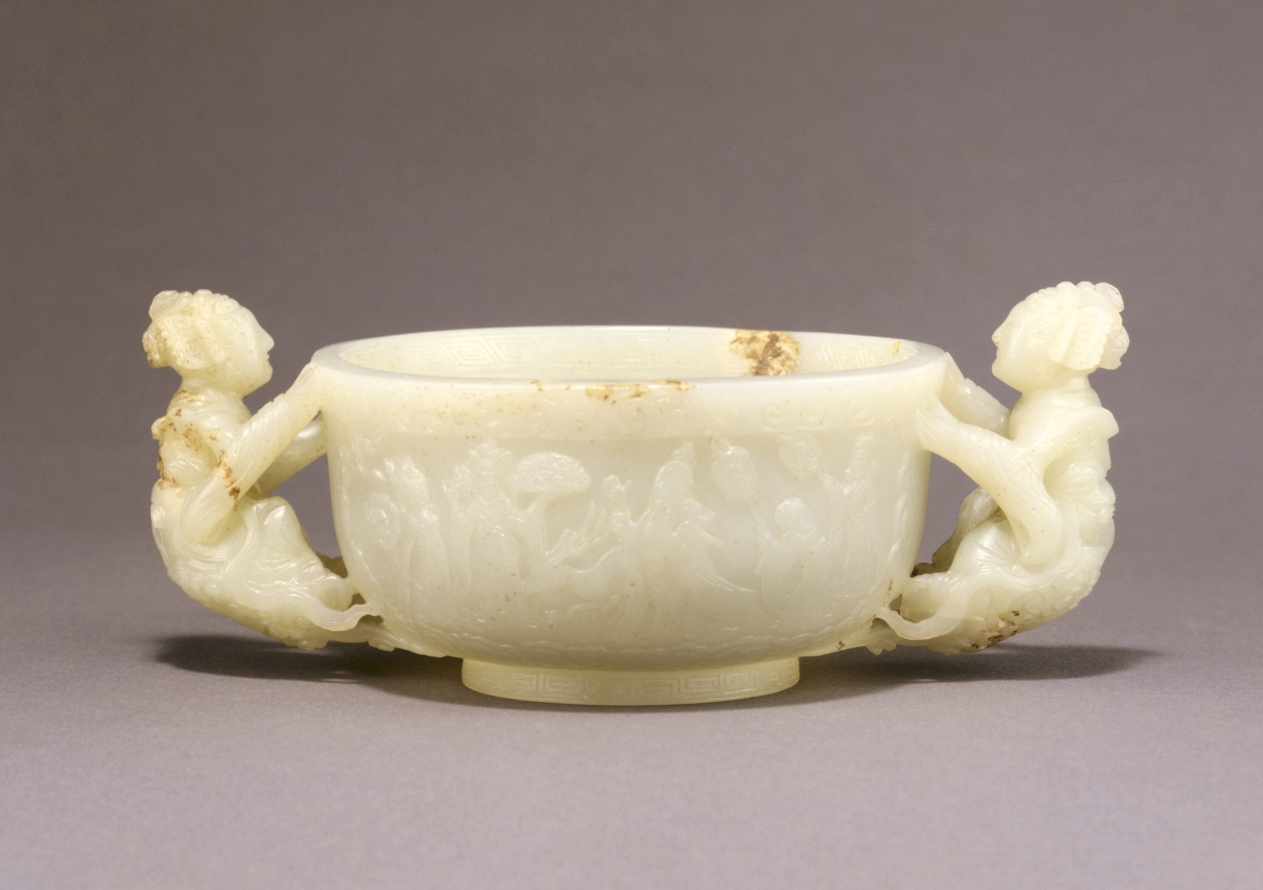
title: Cup with Daoist Figures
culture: China, Qing dynasty (1644–1911), Qianlong period (1736–95)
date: 1736–95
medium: Pale greenish-white jade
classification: Jade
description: During the Qing dynasty, Suzhou’s best products were sent north to the capital. Those that met imperial approval were sometimes graced with Qianlong’s mark, added by calligraphers and jade workers at court. The lack of a Qianlong mark on the Cleveland cup suggests that it might not have reached the court. Previously dated to the Yuan dynasty (1271–1368), new scholarship dates this cup to the Qing period.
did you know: Two female immortals serve as handles, while a Daoist procession with immortals, musicians, and attendants winds around the body of the cup.